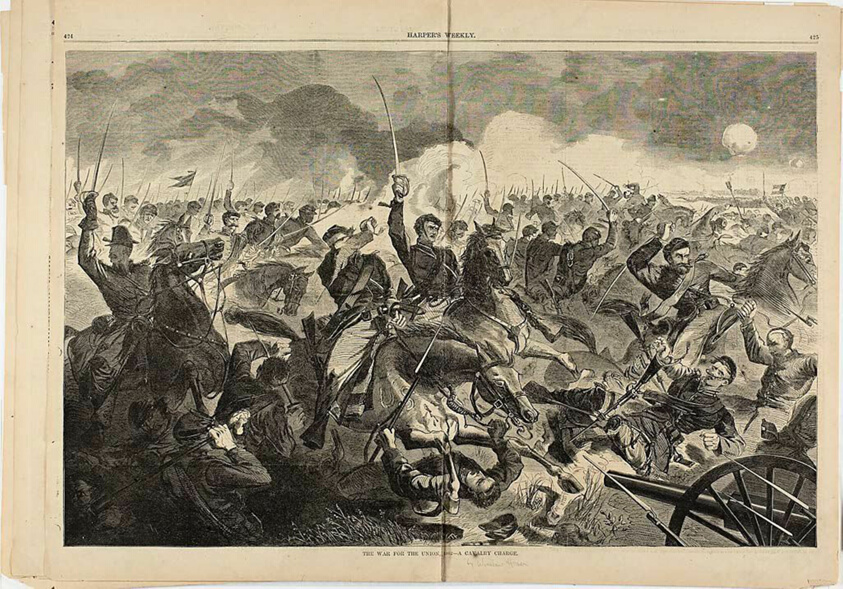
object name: Print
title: The War for the Union, 1862—A Cavalry Charge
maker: Winslow Homer (American, 1836-1910); published by Harper's Weekly (American, 1857-1916)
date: published July 5, 1862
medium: Wood engraving on paper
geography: United States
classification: wood engraving; print; prints and drawing